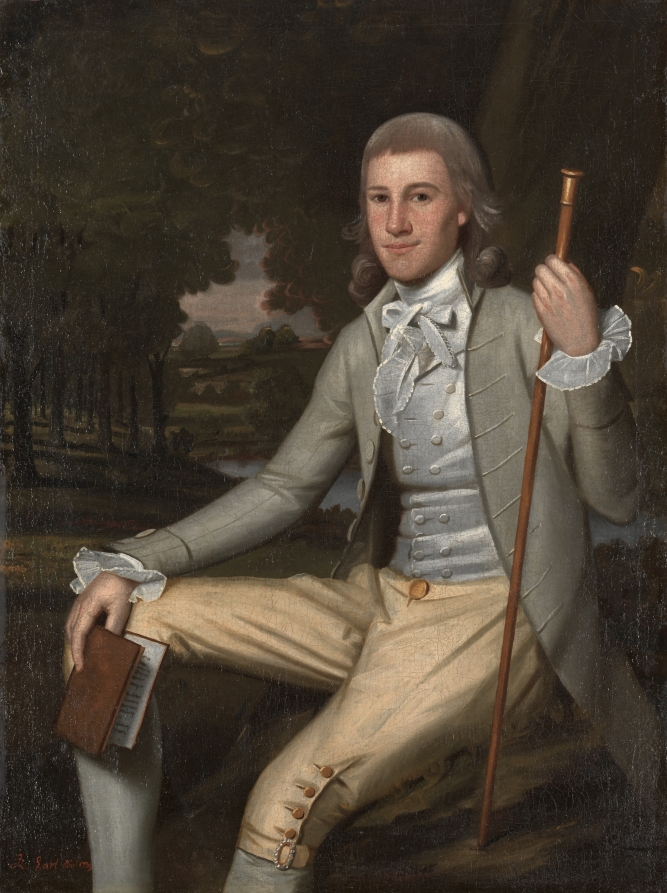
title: Moses Seymour Jr.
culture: America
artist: Ralph Earl (American, 1751–1801)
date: 1789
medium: oil on canvas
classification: Painting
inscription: Signed lower left: R Earl Pinxt 1789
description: Seen here at the age of 15, Moses Seymour Jr. holds a book and cane, suggesting that he reads and walks in harmony with nature. The portrait was commissioned by his father, a former Revolutionary War major who lived in Litchfield, Connecticut. Artist Ralph Earl was the leading painter in the Connecticut River Valley, returning there after receiving training in London.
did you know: This painting descended through the sitter's family until it was given to the museum.